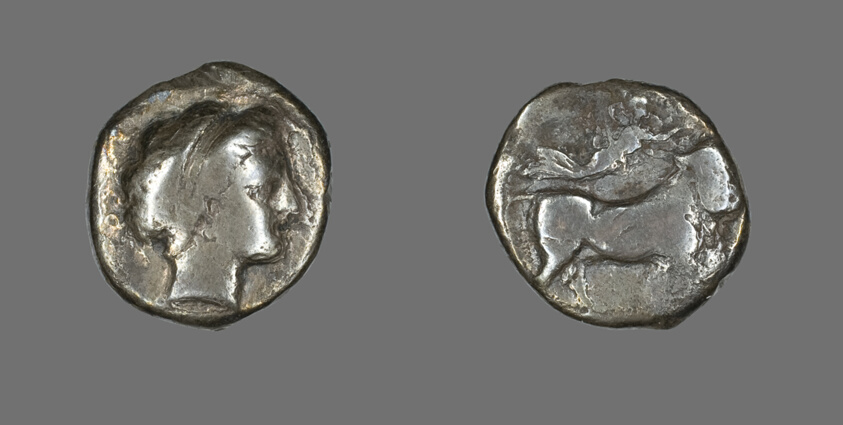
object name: Coin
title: Coin Depicting the Nymph Parthenope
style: roman (ancient, style or period), ancient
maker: Roman; Campania, minted in Neapolis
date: late 5th-4th century BCE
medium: Silver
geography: Roman Empire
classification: coin; ancient art